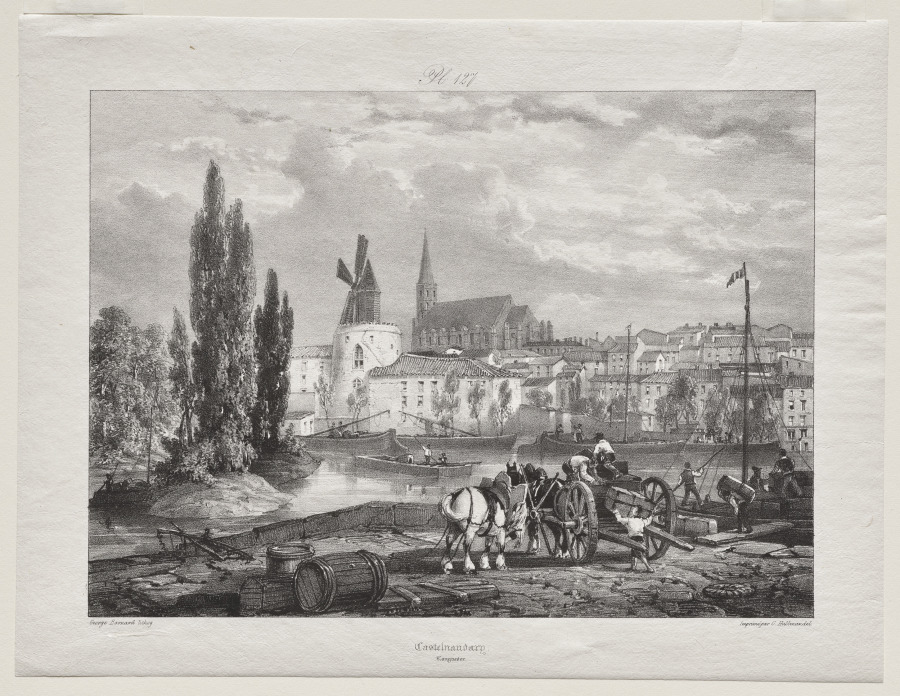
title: Voyages pittoresques et romantiques dans l'ancienne France (Languedoc II, part I): Castelnaudary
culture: England, 19th century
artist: George Barnard (British, 1807–1890)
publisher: Hullmandel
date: 1835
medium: lithograph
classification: Print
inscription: In plate, center, above image: "Pl. 127"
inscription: in plate, left, below image: "George Barnard Lithog"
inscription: in plate, center, below image: "Castelnaudary (Languedoc)"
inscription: in plate, right, below image: "Imprime par C Hullmandel"